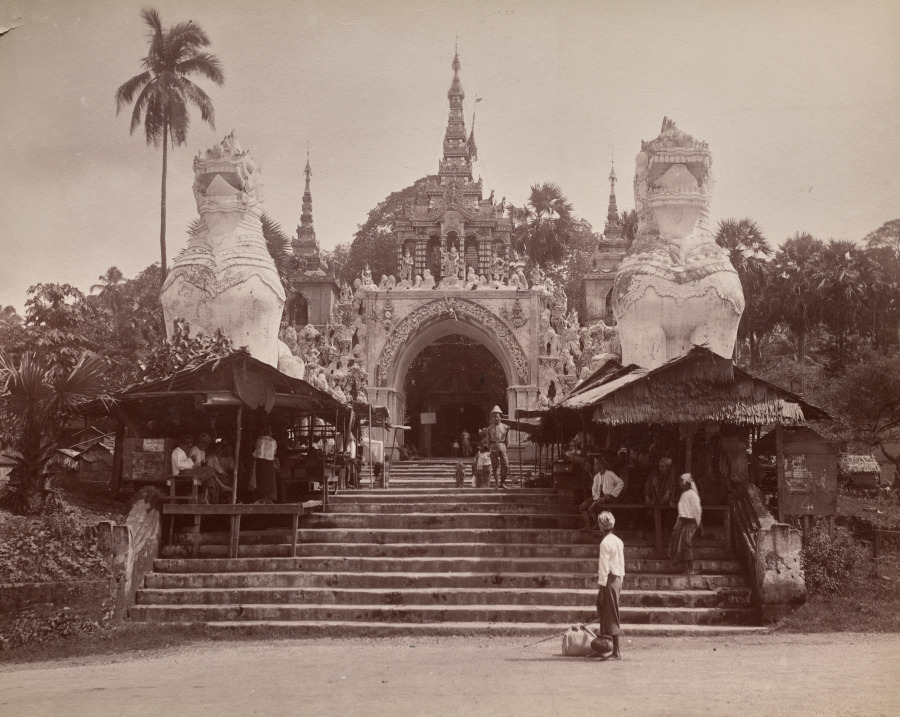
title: Untitled (steps and building, verso)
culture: England, 19th century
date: 1870s-1880s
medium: albumen print mounted on an album page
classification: Photograph